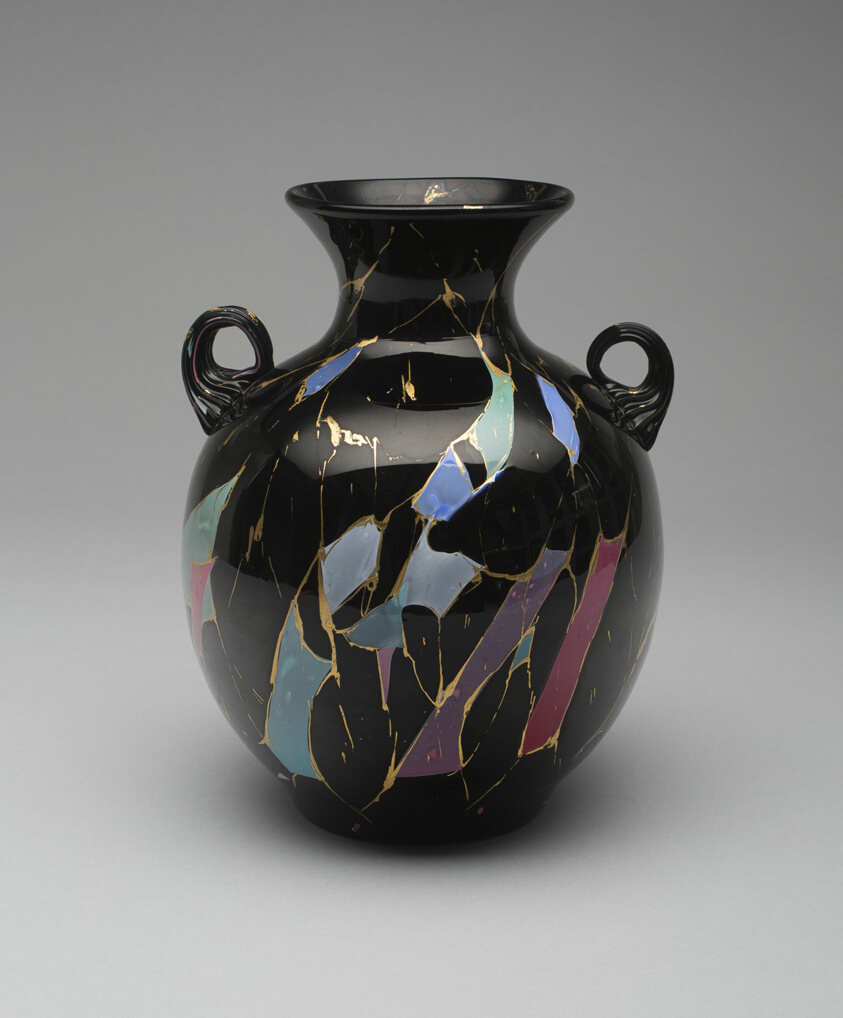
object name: Glass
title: Sicilian Vase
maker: Frederick S. Shirley (American, active 1873–1894); Mount Washington Glass Company (American, 1837–1900); New Bedford, Massachusetts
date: c. 1878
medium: Glass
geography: New Bedford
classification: vase; glass; american decorative arts; american arts; decorative arts